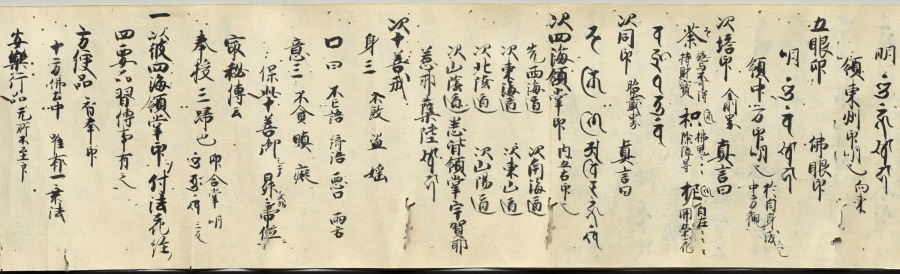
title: Scroll of Miscellaneous Notes written on a Calendar by Priest Seigen (recto)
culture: Japan, Kamakura period (1185–1333)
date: c. 1200–1231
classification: Manuscript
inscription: bears miscellaneous notes written by Priest Seigen.